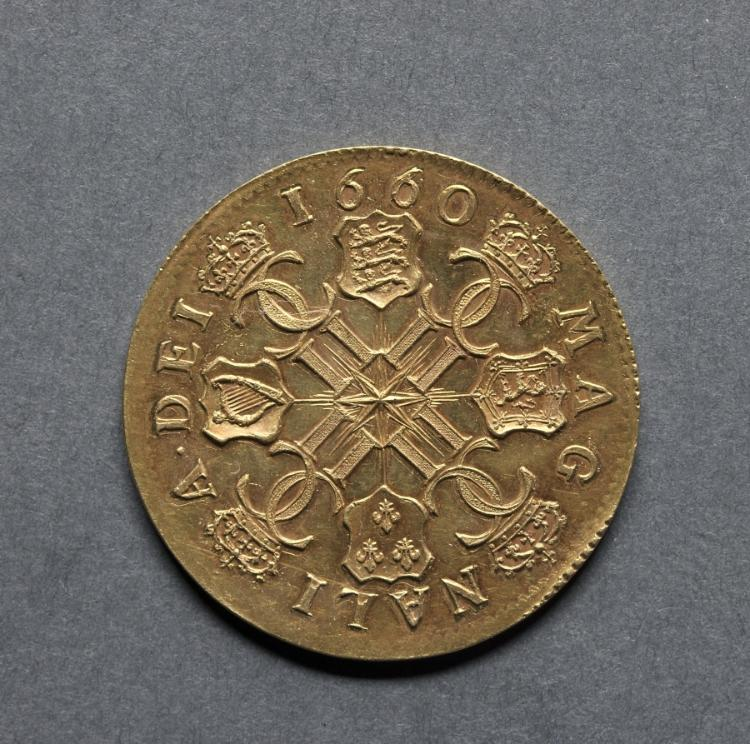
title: Broad: Shields of England, Scotland, France and Ireland with Crowned Interlocked Cs (reverse)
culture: England, Charles II, 1660-1685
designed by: Thomas Simon (British, c. 1623–1665)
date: 1660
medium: gold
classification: Coins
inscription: 1660 MAG MALI A·DEI